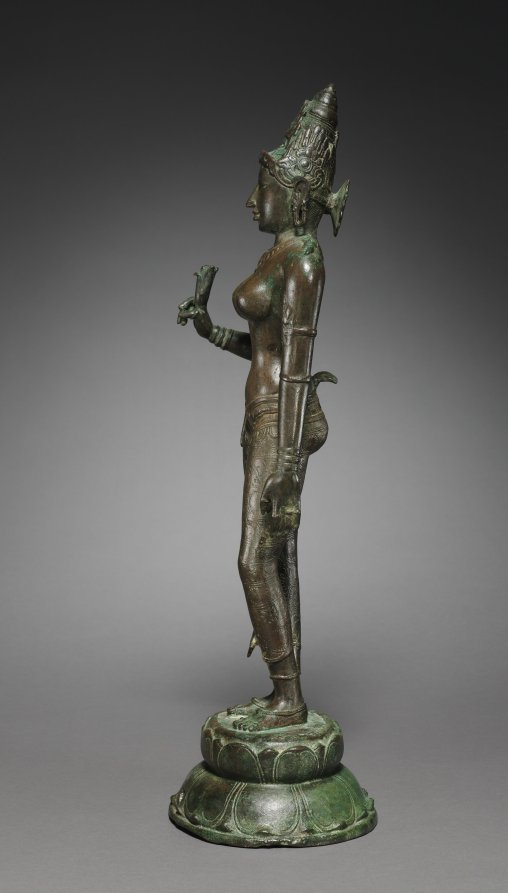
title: Goddess Holding a Lotus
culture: South India, Tamil Nadu, Chola period (900-13th Century)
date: c. 950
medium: bronze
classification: Sculpture